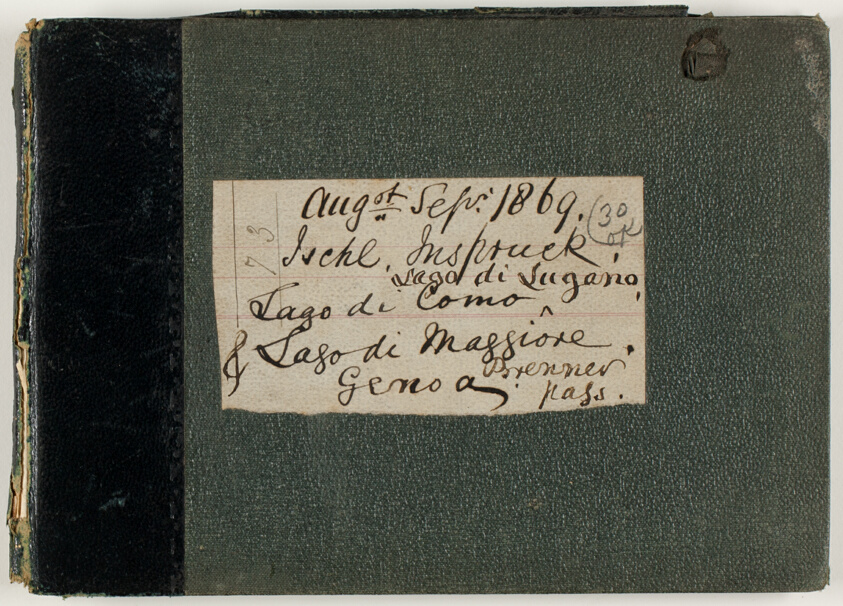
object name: Book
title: Inspruck, Italian Lakes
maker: Charles George Lewis (English, 1808-1880)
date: 1869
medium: Sketchbook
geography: England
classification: sketchbook; watercolor; prints and drawing; book